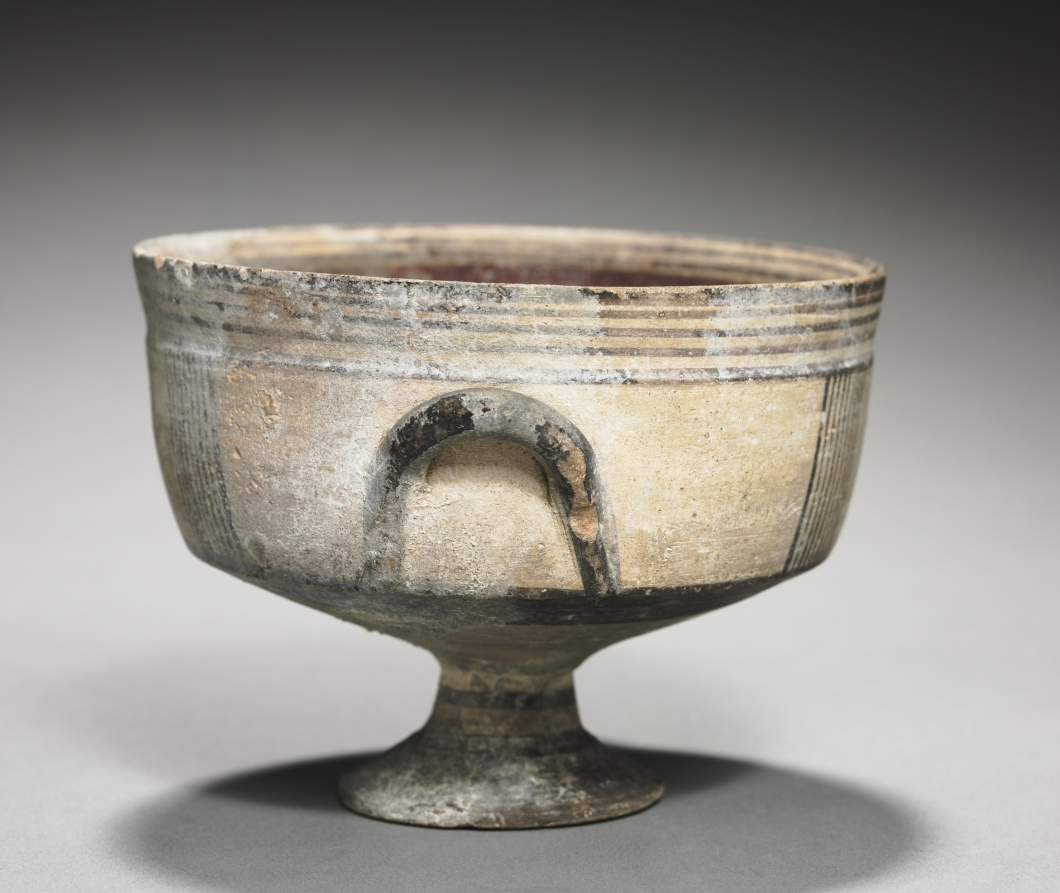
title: Footed Bowl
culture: Cyprus, Cypro-Geometric III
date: c. 850–750 BCE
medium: white painted ware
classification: Ceramic